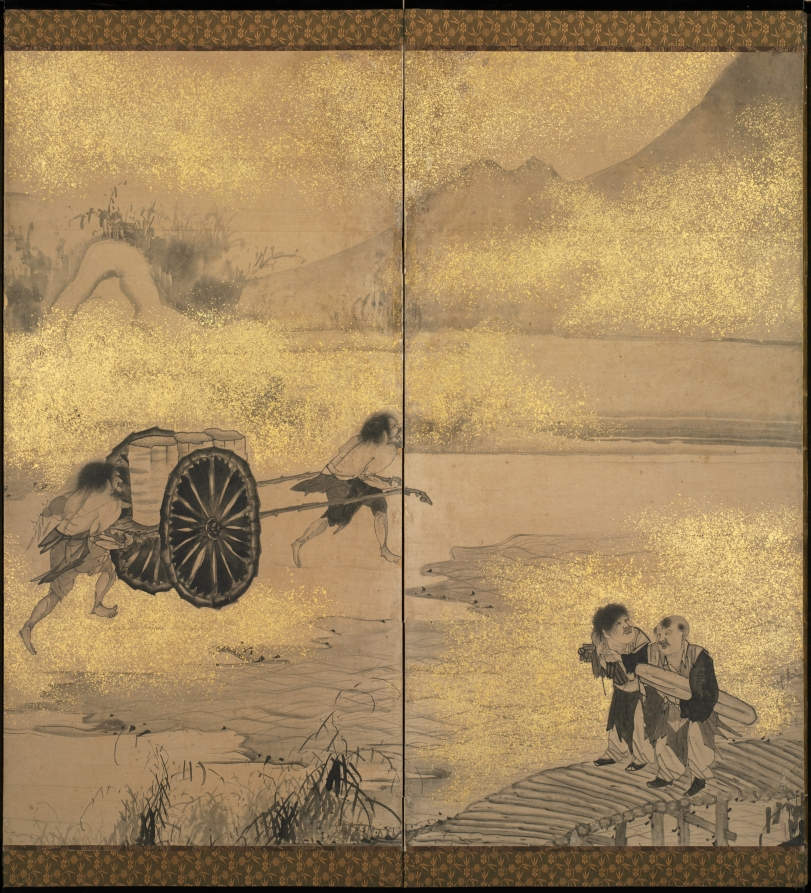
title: The Eight Immortals of the Wine Cup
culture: Japan, Edo period (1615–1868)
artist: Soga Shōhaku (Japanese, 1730–1781)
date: later 1700s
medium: Six-panel folding screen, ink and cut-gold foil on paper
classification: Painting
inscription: signature, lower right corner.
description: Responding to the desires of the middle class (chonin), some Japanese painters of the late Edo period moved away from the seriousness associated with the Chinese theme of reclusion, focusing instead on the motif’s humorous aspects. The theme Eight Immortals of the Wine Cup is based on a poem by the renowned 8th-century Chinese poet Du Fu about his eight colleagues. These scholars eagerly sought release from their official governmental duties and then supposedly fled the capital for the countryside. There, they engaged in wildly eccentric behavior and adventurous creative work, all fueled by copious amounts of wine. Shohaku’s version of events exaggerates the scholars’ pleasure, as seen in their comical facial expressions.